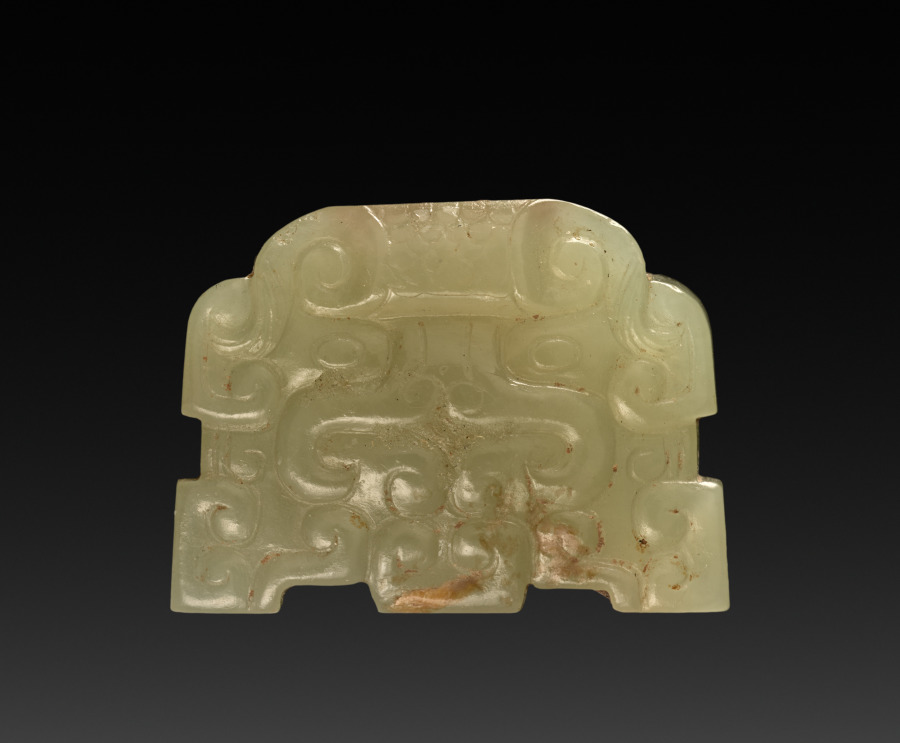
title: Ogre Mask (Taotie)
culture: China, Eastern Zhou dynasty (770–256 BCE), Warring States period (475–221 BCE)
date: 475–221 BCE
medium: nephrite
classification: Jade